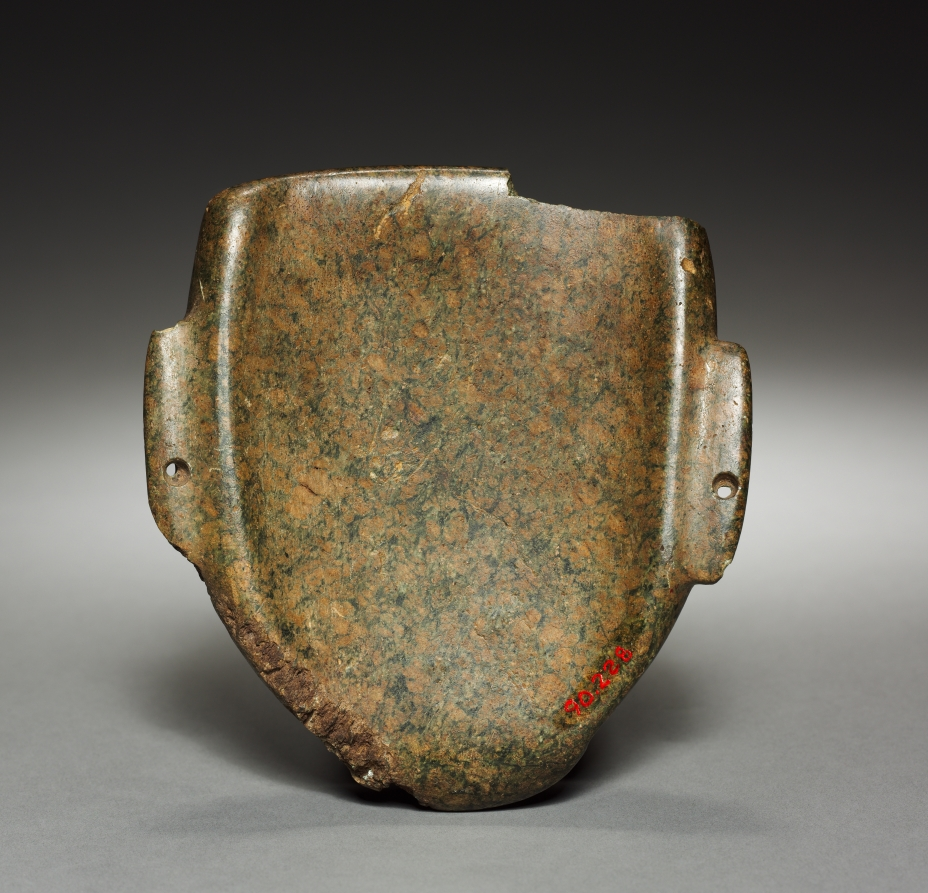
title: Mask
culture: Central Mexico, Teotihuacán, Guerrero(?), Classic period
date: 1–550 CE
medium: green stone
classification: Stone